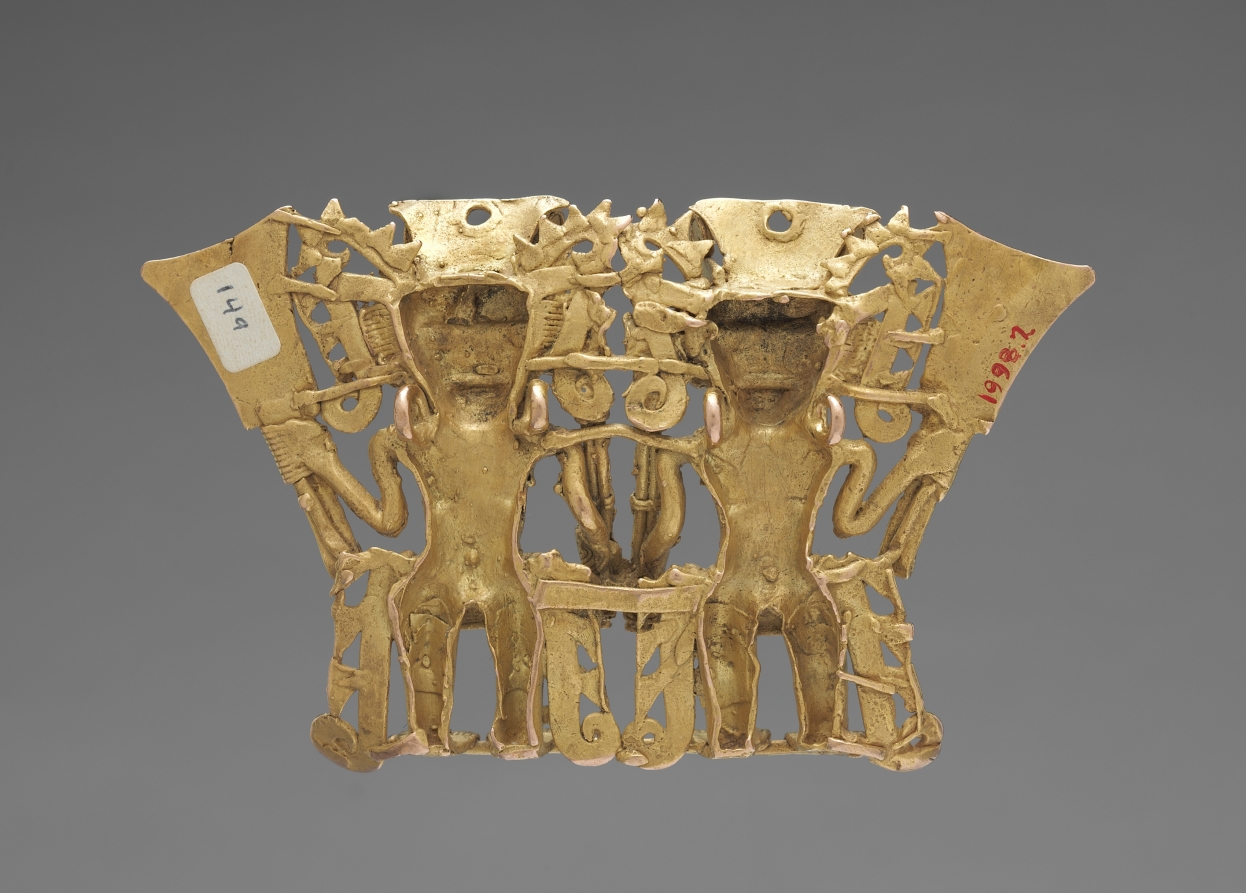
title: Bat-Nosed Figures Pendant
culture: Panama, Azuero Peninsula, Parita style, 11th-16th century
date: 1000–1550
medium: cast gold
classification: Metalwork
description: Both pendants depict paired figures with tusklike noses. The "tusks" perhaps refer to the upswept nose of the leaf-nosed bat, an agile hunter whose "leaf" helps it to snatch prey from midair. The bat's success as a hunter is part of the reason that some identify such paired figures as warriors. They each hold a paddle-shaped object; the larger pair, in elaborate costumes, also clutches staffs.